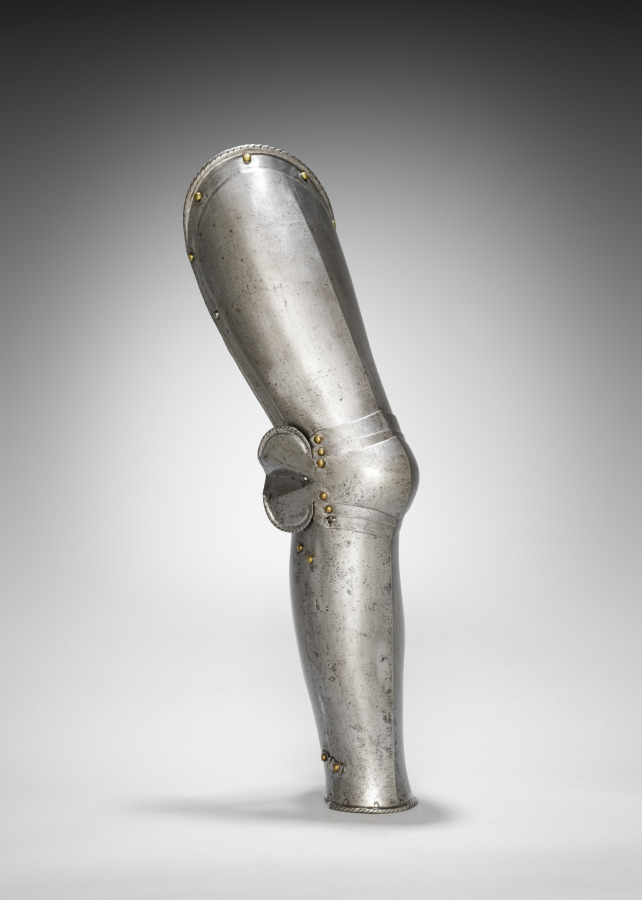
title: Proper Right Greave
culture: South Germany, 16th century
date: c. 1560–1580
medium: steel, leather straps, brass rivets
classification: Arms and Armor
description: This armor was developed for the joust-a sporting combat between two mounted contestants. Although all of the elements of this armor date from the same period, they are not all from the same suit. This armor is thus called "composed." It also shows the asymmetry of jousting armor. The participants rode along a wall-like barrier known as a "tilt" with their left sides facing one another. Consequently, armor on that side of the body had to be thicker. Note the large plate (grandguard) over the left shoulder for extra protection. Also, the breathing holes in the helmet were placed on the right side (farthest from an opponent's lance) to avoid injuries from splinters. The bracket attached to the right breastplate is called the lance-rest, a shock-absorbing support designed to accommodate the lance when "couched" under the right armpit.